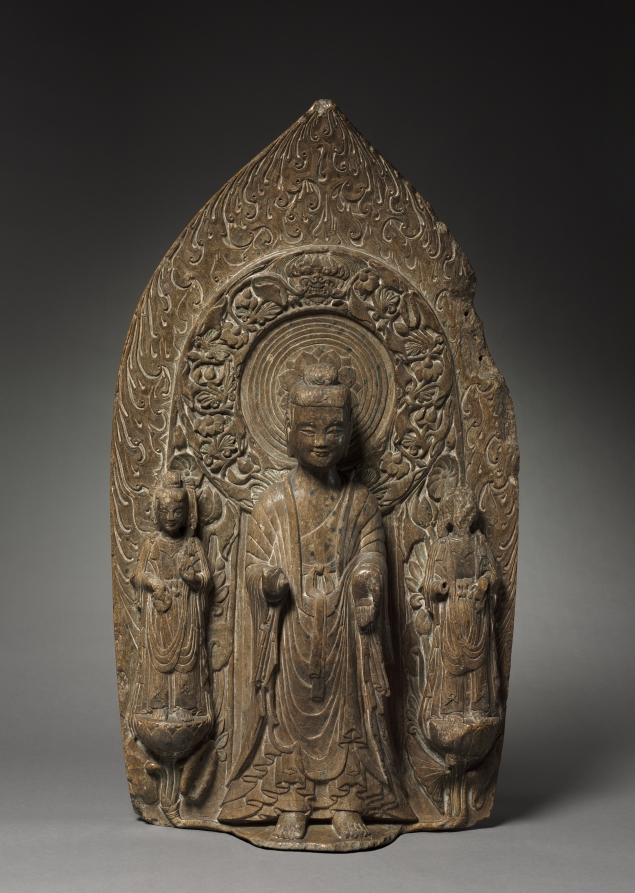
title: Stele with Sakyamuni and Bodhisattvas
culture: China, Hebei province, Eastern Wei dynasty (534-550)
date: 537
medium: limestone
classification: Sculpture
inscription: Fully inscribed on reverse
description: According to the inscription, this stele was commissioned in 537 by Yuan'ning, prince of the Gaoping branch of the imperial Wei family, in memory of his deceased consort, in the hope that it would bring her to the Western paradise. It was carved by one of the finest craftsmen in the Eastern Wei capital of Ye in Hebei province. Here, the Buddha's robe shows a careful arrangement of patterned drapery (large U-shaped folds and scallop-shaped folds at the hem), combining linear rhythms with an ordered symmetry. Soaring flames edge the mandorla (almond-shaped halo), echoing the linear eloquence of Chinese painting.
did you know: Traces of polychrome paints remaining in the interstices of the carving, particularly on the foliate carving around Shakyamuni, suggest the stele was originally brightly colored.